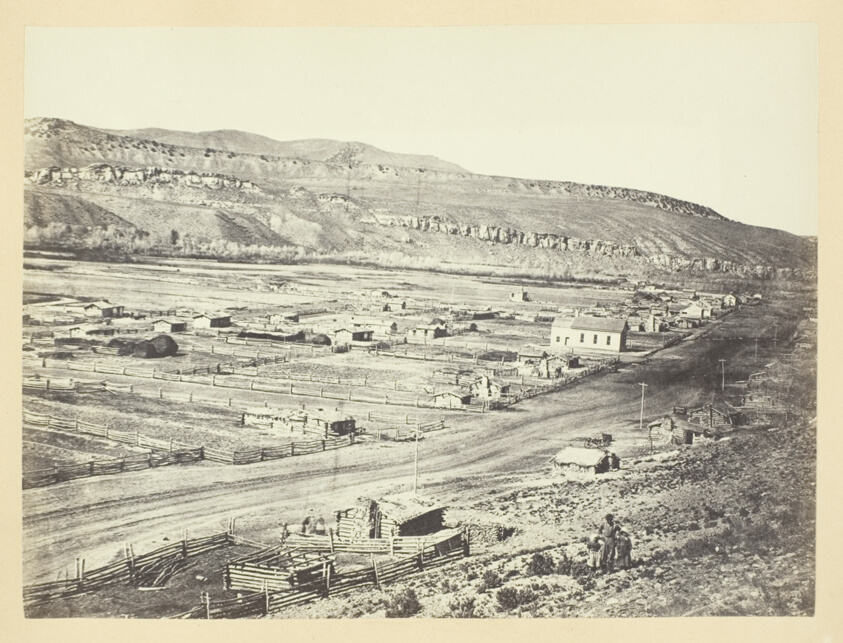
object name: Photograph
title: Coalville, Weber Valley, Utah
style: 19th century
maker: Andrew J. Russell; American, 1830–1902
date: 1868/69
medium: Albumen print, pl. XVIII from the album "Sun Pictures of Rocky Mountain Scenery" (1870)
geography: United States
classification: photograph; albumen silver print; photography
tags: Collected by Hugh Edwards